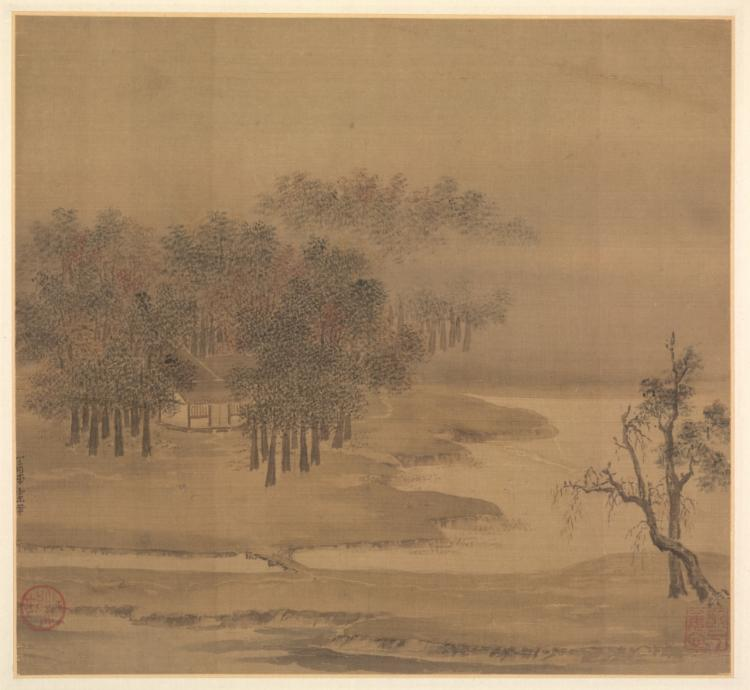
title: Cottages in a Misty Grove in Autumn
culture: China, Northern Song dynasty (960-1127)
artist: Li Anzhong (Chinese, active first half of the 1100s)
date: 1117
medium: Album leaf; ink and color on silk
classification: Painting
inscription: Artist's inscription: In the ting-yu year [1117], Li An-chung painted. 2 seals of Wu T'ing (ca. 1600).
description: This leaf is an early example of a new mode in landscape painting expressed in vistas of water-rich scenery that developed since the 900s. Li Anzhong, a court artist during the 1100s, witnessed the transition of the capital from Kaifeng across the Yangzi River to Hangzhou.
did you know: This painting showcases a delicate painting technique and an intimate view.